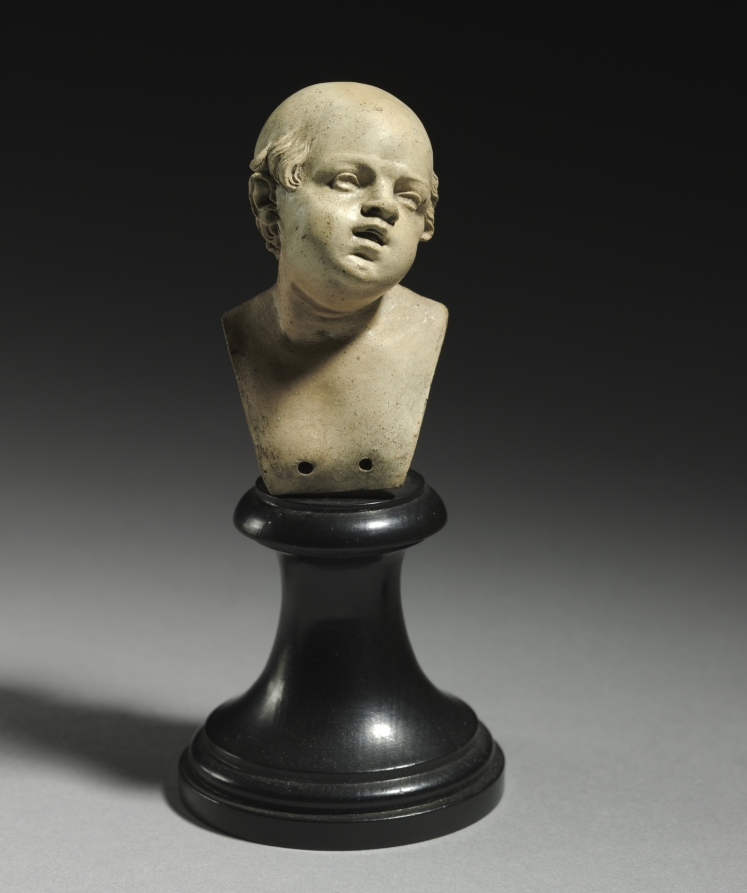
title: Head of a Man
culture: Italy, Naples(?), early 19th Century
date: c. 1800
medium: terracotta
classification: Sculpture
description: Each of these miniscule terracotta busts has allegedly been formed by hand, though the precision of the detailed features implies that they have been cast from a mold. Details such as the meticulously executed facial features and the thin, exact rows of hair on each figure suggest a manufactured method of creation. Furthermore, these figures lack any trace of fingerprints that handmade figures of this time typically bear. Small holes at the base of each bust suggest that the heads were once attached to bodies that may have been used as crèche figurines. The busts were created in Naples where large numbers of nativity scenes were produced around the turn of the nineteenth century. The similarity in size to archetypal terracotta crèche figurines as well as the vast production of nativities in Naples at this time suggest that these busts were created for a nativity scene.